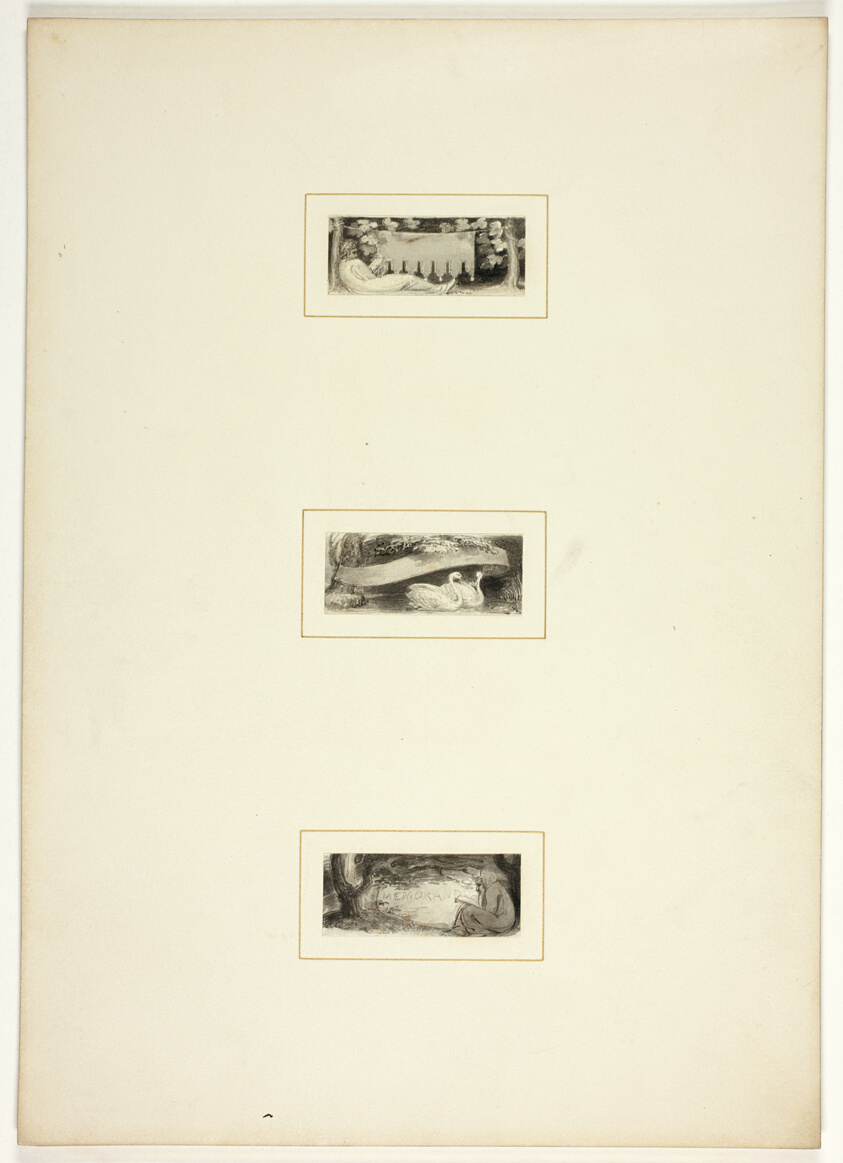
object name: Drawing and Watercolor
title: Study for a plate from Telemachus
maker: Thomas Stothard (English, 1755-1834)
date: c. 1797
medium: Ink wash on paper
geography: England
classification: ink and wash; prints and drawing; paper; drawings (visual works)